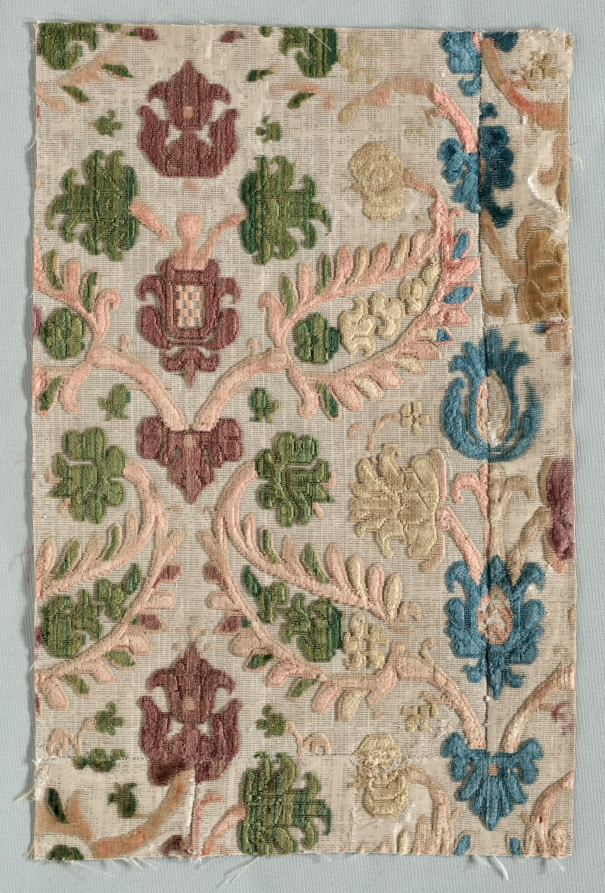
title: Velvet Fragment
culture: Italy, 17th century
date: 1600s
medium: velvet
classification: Velvet